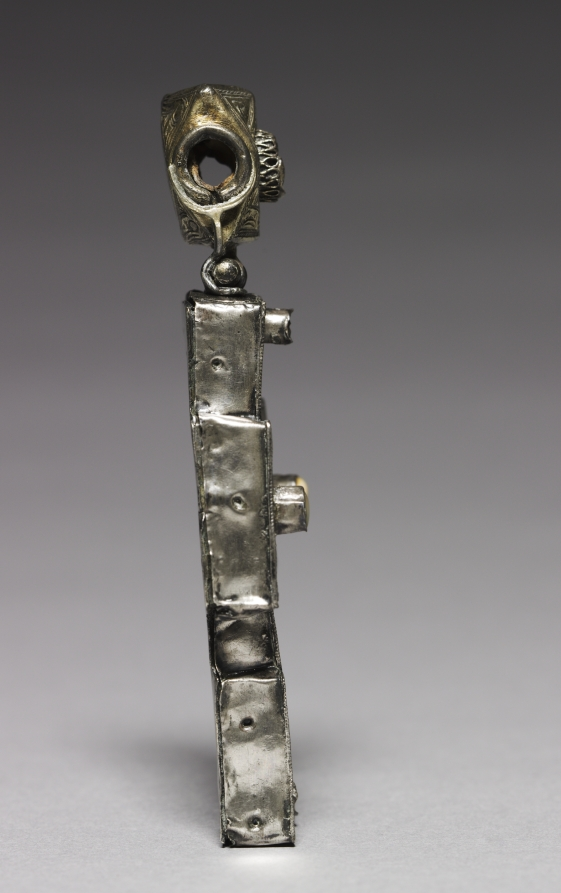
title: Pectoral Cross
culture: Byzantium, Russia, Byzantine period, 17th century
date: 1600s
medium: walrus ivory, wood, partially gilt silver and pearls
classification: Ivory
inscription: Slavonic inscriptions on obverse and reverse.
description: This ivory cross is carved on the front with scenes drawn from Twelve Feasts of the Orthodox Church, including the Passion and Resurrection of Christ; on the reverse is a scene of the Mother of God surrounded by clergy. The scenes include Slavonic inscriptions. The ivory cross is mounted within a silver frame as a pectoral to be worn at the breast, probably by a priest.